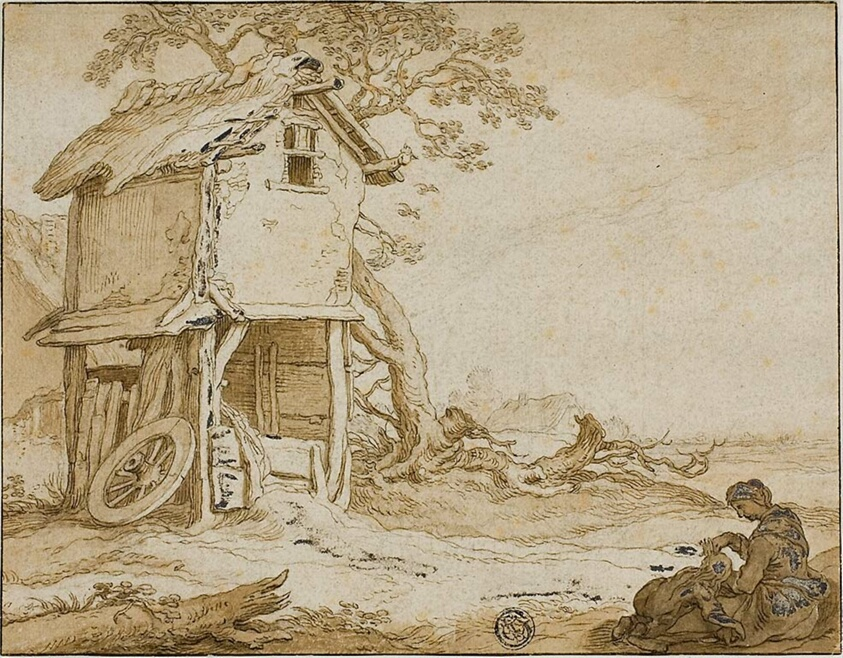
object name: Drawing and Watercolor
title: Landscape with Barnstable, Seated Woman, and Child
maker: Attributed to the school of Abraham Bloemaert (Dutch, 1566-1651); or Esaias van de Velde, I (Dutch, c. 1590-1630)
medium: Pen and brown ink, with brush and brown wash, heightened with lead white (discolored), over traces of graphite, on ivory laid paper, laid down on ivory laid paper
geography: Netherlands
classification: pen and ink drawings; drawings (visual works); prints and drawing